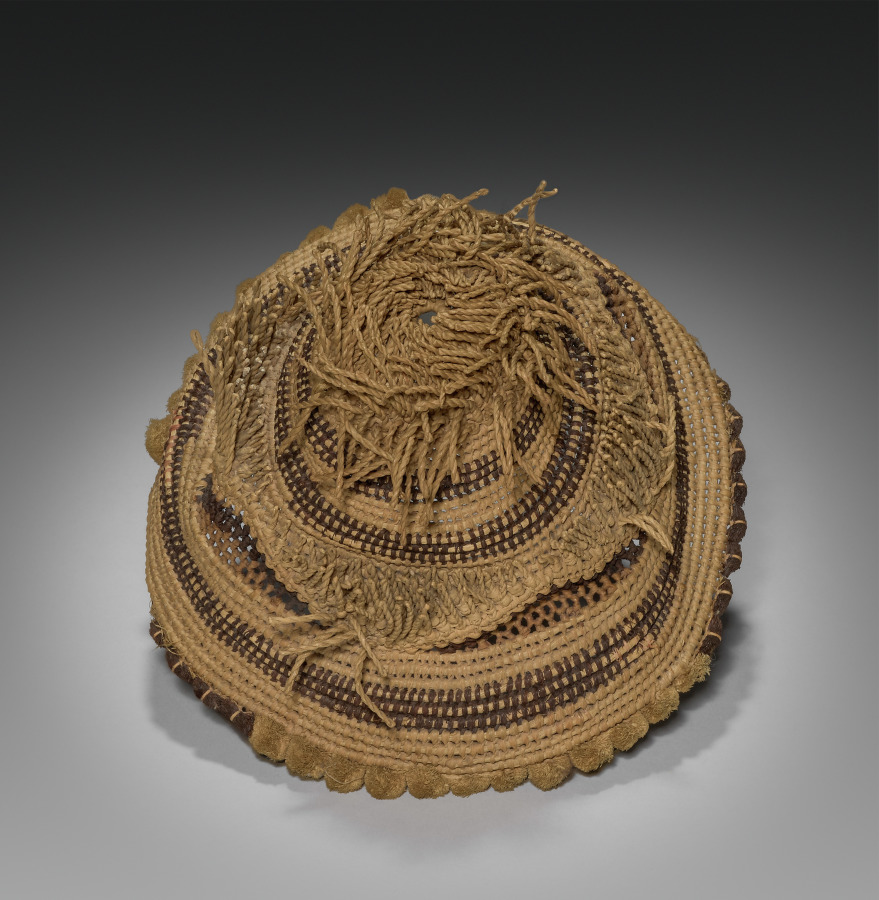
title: Hat with Pin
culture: Africa, Central Africa, Democratic Republic of the Congo, Kuba-style maker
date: early 1900s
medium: Raffia and dye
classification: Garment